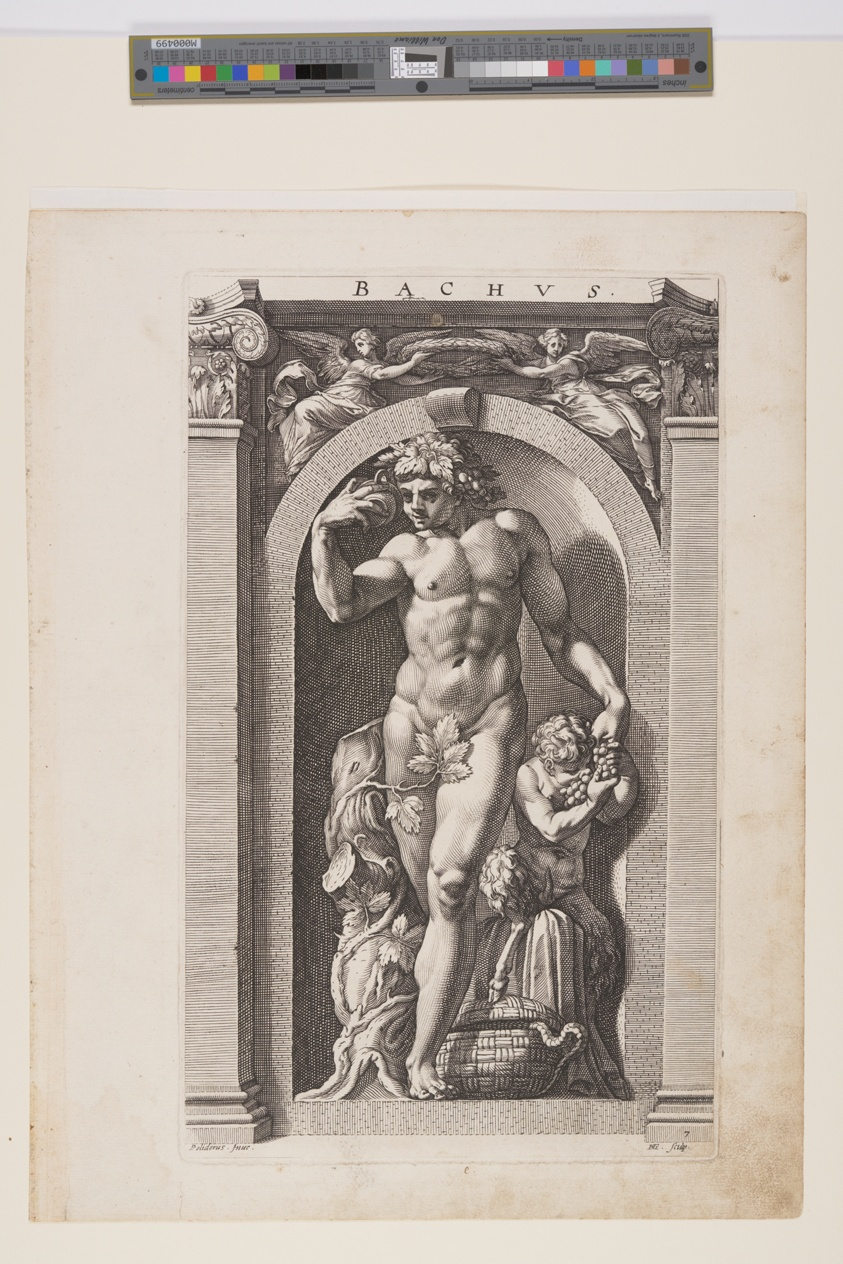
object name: Print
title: Bacchus, from Eight Pagan Gods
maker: Hendrick Goltzius (Dutch, 1558–1617); after Polidoro da Caravaggio (Italian, c. 1499–c. 1543)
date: 1592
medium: Engraving on ivory laid paper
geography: Netherlands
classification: print; paper; prints and drawing; engraving